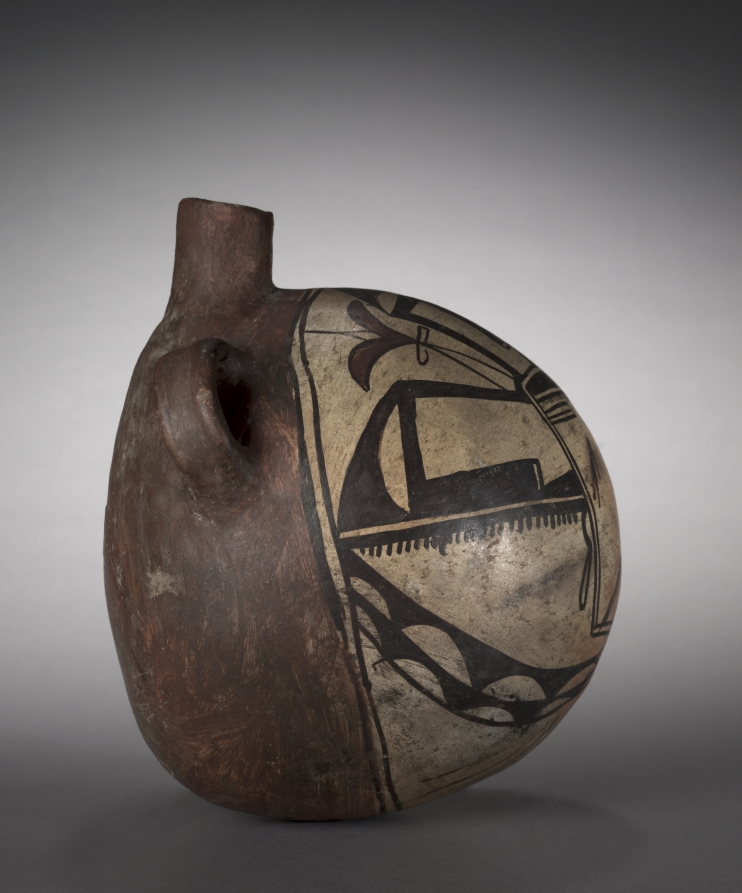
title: Canteen with a Katsina-like Face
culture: Native North America, Southwest, Arizona, Pueblo, Hopi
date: 1890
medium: ceramic, slip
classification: Ceramic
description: Since the 1500s, Hopi women made big-bellied canteens, based on Spanish prototypes, and used them to carry water. By the late 1800s, canteens became popular with Euro-American tourists, who increasingly flocked to the Southwest in search of encounters with “exotic” Native American cultures. Thus, Hopi artists embellished their wares to improve their appeal. This example is painted with a face similar to a Katsina’s, a spirit being central to Pueblo religion—but it is a fanciful rendition, not an actual Katsina. Could the maker have been taking control of her culture and its consumption by outsiders?